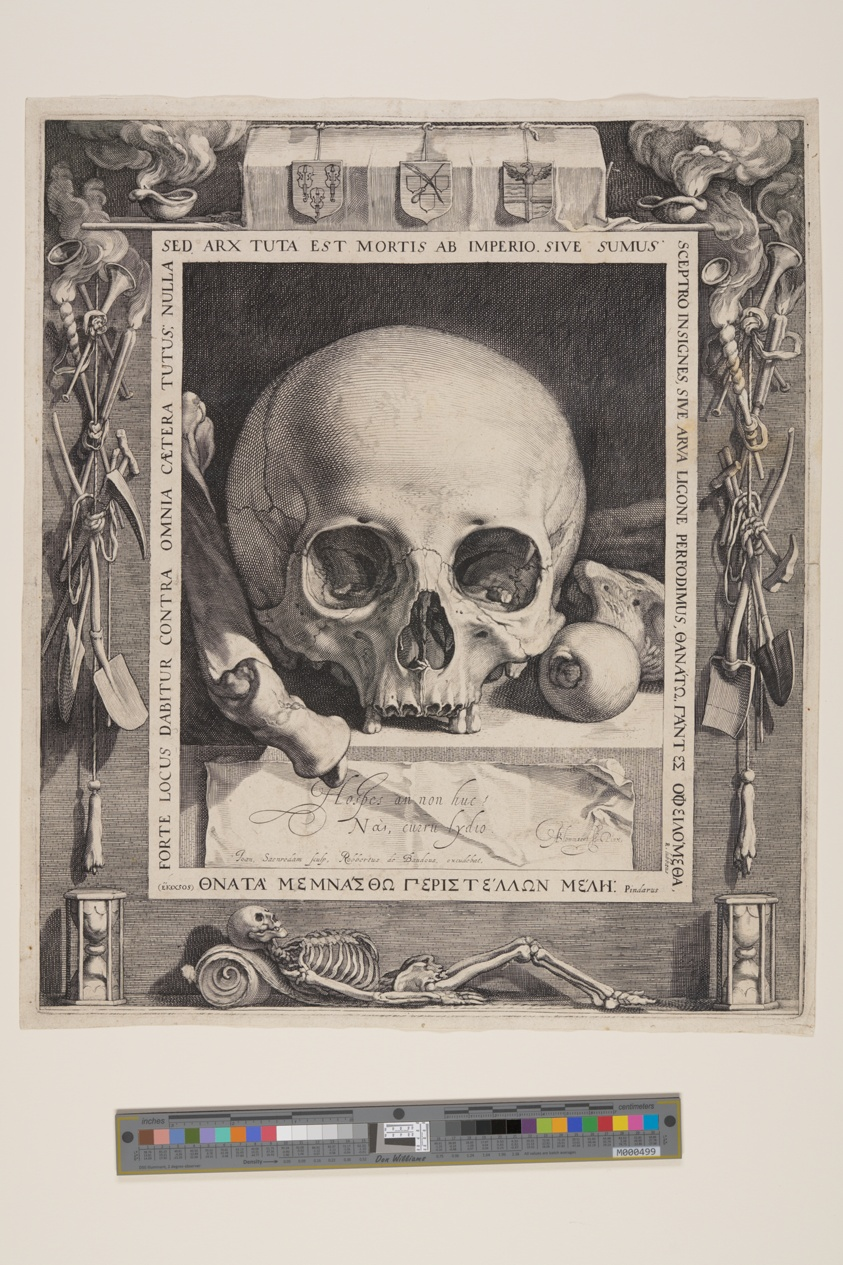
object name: Print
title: Vanitas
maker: Jan Saenredam (Dutch, 1565–1607); after Abraham Bloemaert (Dutch, 1566–1651)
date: c. 1600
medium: Engraving on ivory laid paper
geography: Netherlands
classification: print; paper; prints and drawing; engraving